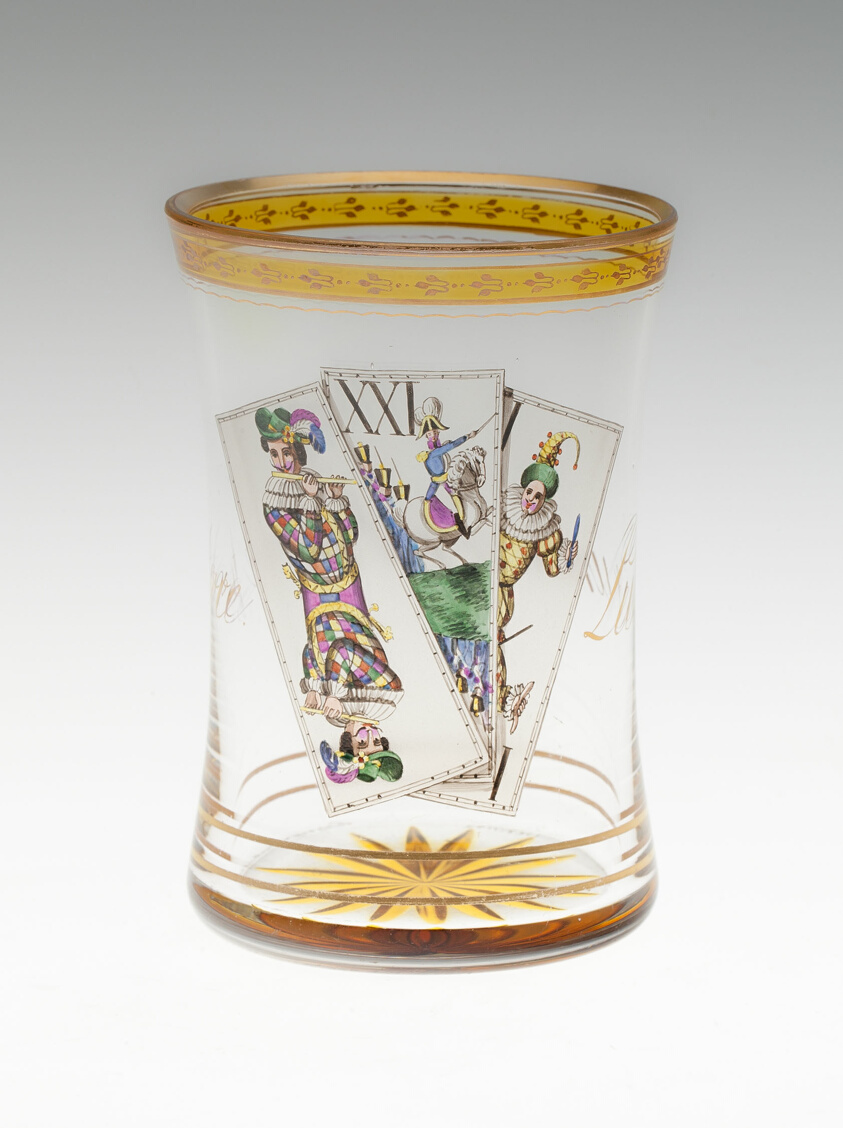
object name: Glass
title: Beaker with Tarot Cards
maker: Anton Kothgasser; Austrian, 1769-1851; Vienna, Austria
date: c. 1820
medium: Glass; colorless, blown, cut, transparent enamels and gilding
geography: Vienna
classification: drinking vessel; glass; european decorative arts